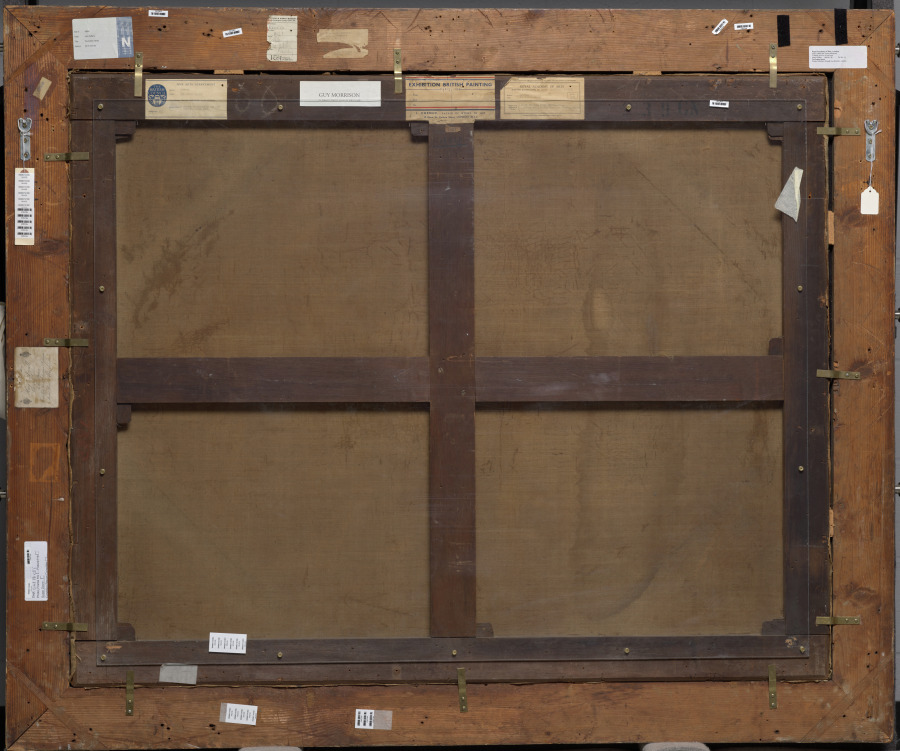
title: The Dutton Family in the Drawing Room of Sherborne Park, Gloucestershire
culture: England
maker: Johann Zoffany (German, 1733–1810)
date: c. 1772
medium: oil on canvas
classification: Painting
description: This type of picture, known as a conversation piece, was invented in England in the 1700s and popular for the informal way it represented families. A father and daughter, mother and son, are strategizing over the next hand in a game of cards. The family recently lost a loved one, so the parents are dressed in full mourning (black clothing), and the siblings in lesser mourning (mauve, white, and gray).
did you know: This is an idealized, not actual, room showing the sitters’ fashionable interior decorating aspirations.